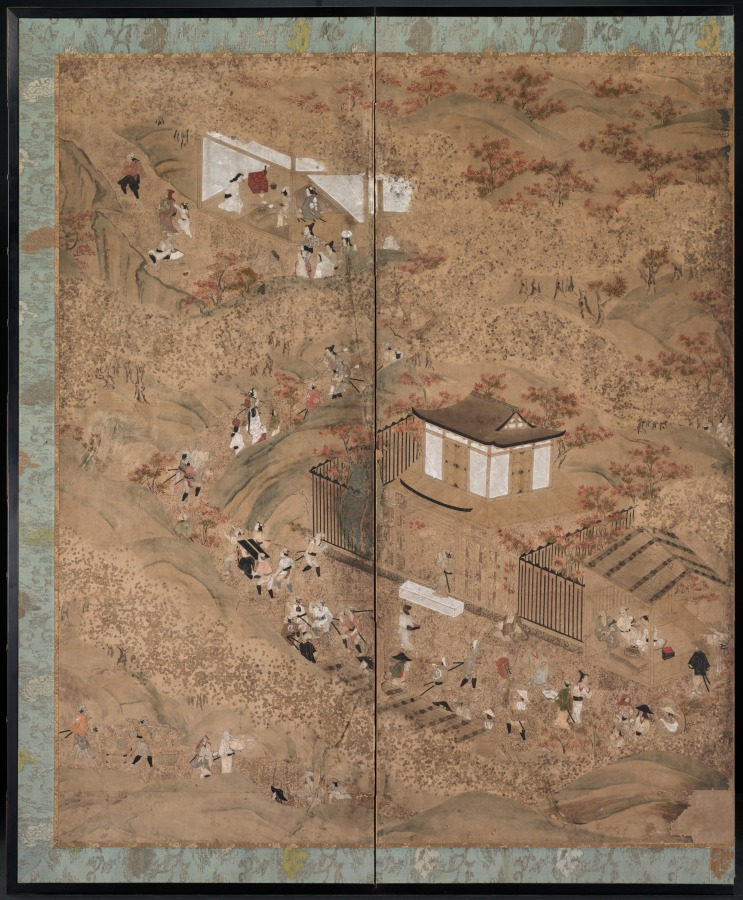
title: Autumn in the Mountains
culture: Japan, Edo period (1615–1868)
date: 1600s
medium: six-fold screen; ink and color with applied silver and gold leaf on paper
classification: Painting